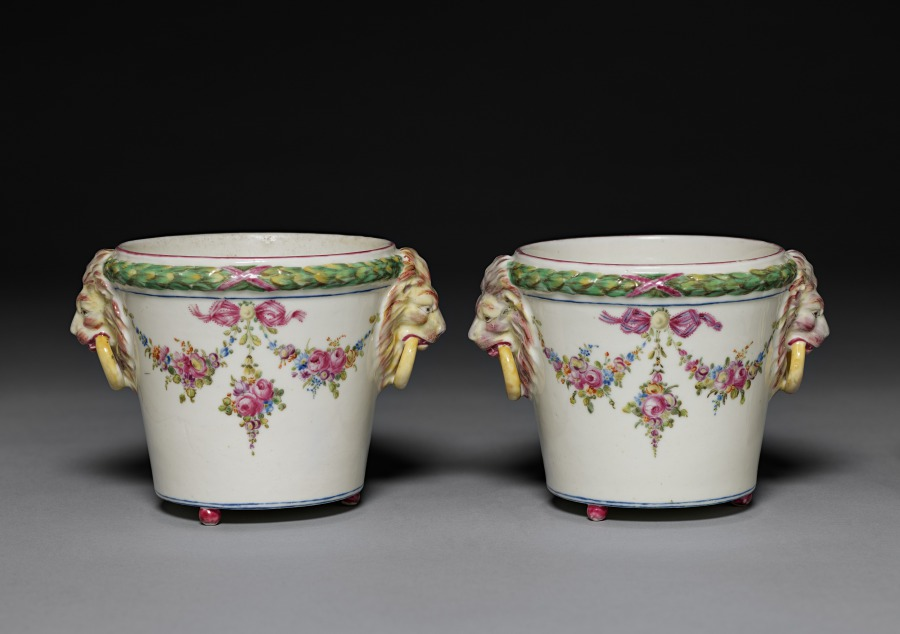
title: Pair of Flower Pots (Pots de fleurs)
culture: France, Bourg-la-Reine, 18th century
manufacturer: Bourg-la-Reine Factory (French)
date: c. 1775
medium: soft-paste porcelain with enamel decoration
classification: Ceramic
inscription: [Incised on both, on bottom]: "BR"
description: The mark on this piece indicates that it was made after the Mennecy factory was moved to Bourg-la- Reine in 1773. The tradition of Mennecy's decoration on soft-paste porcelain can be recognized in the piece, but its style has been modified in response to the emerging neo-classic taste. The flowers are now organized into formal garland's and motifs of classical origin, such as the lion's heads, are introduced.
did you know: These objects would have acted as cachepots, ornamental containers in which a flower pot is placed to hide it from view.